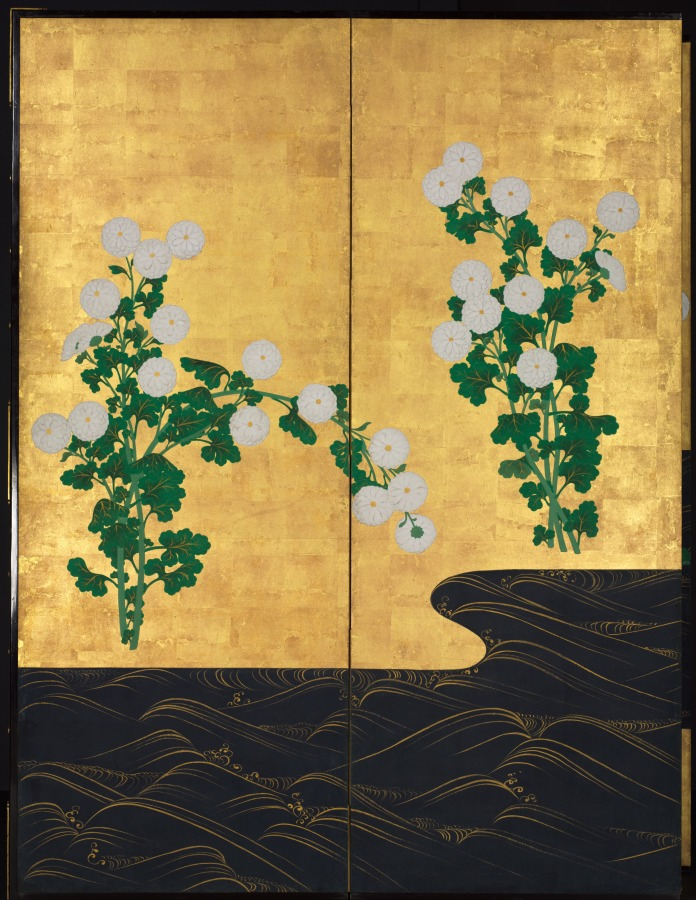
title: Chrysanthemums by a Stream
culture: Japan, Edo period (1615–1868)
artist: possibly by Ogata Kōrin (Japanese, 1658–1716)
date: c. 1715–30 or later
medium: One of a pair of six-panel folding screens; ink and color on gilded paper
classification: Painting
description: These screens recall a painting style so closely identified with Ogata Kōrin (1658–1716) that it is called Rinpa, or “Rin School,” after the ideograph “rin” in his name. The highly stylized background accentuates floral groupings that have been groomed so as to appear utterly artificial, like the synthetic arrangements available today. Kōrin's genius derived in large measure from natural phenomena painstakingly observed and then manipulated to create compositions of startling refinement and sparkling isolation. This process may have grown out of Kōrin's early immersion in the family textile business, a medium that encourages such dramatic distillations of form: the stream's gold-crested waves bring to mind traditional kimono robe designs of Kōrin's era. Works with the signature seen on this painting, including a style name, or persona suggested to Kōrin by his brother Kenzan (1663–1743), are sometimes considered to have been produced either in the last year of his life, when he was very ill, or after his death. In both scenarios, the lion’s share of the work would have been done by studio assistants, but little is truly known of his studio practice. Given the regularity of the gold waves on the stream, and the tension in the arrangement of the chrysanthemums, it is also possible that the screens were made in emulation of Kōrin's designs by a later artist.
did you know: The signature used on these screens may indicate paintings made in the last year of the artist's life, or works completed by his studio after his death.